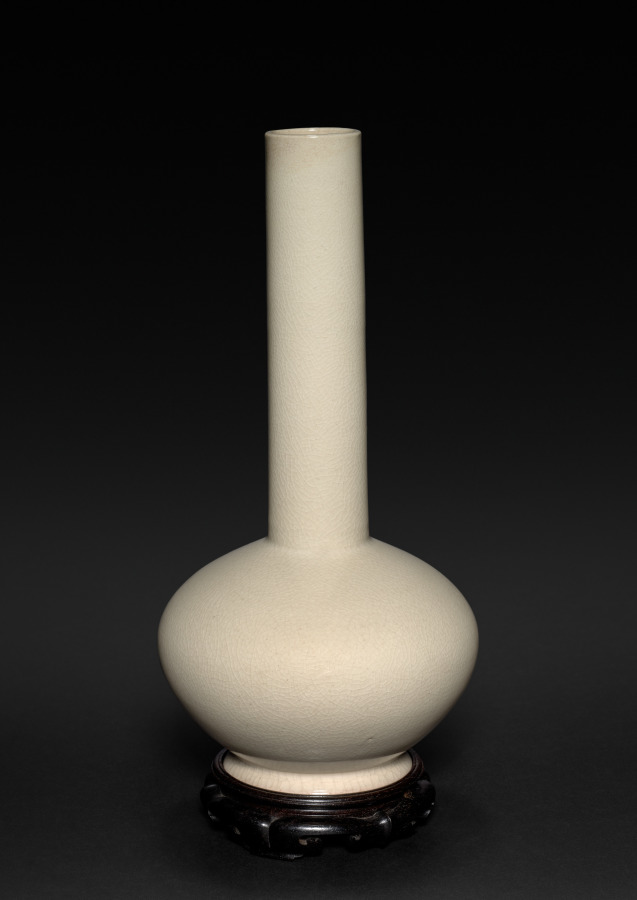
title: Long-Necked Vase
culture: Japan, Meiji period (1868–1912)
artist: Seifū Yohei III (Japanese, 1851–1914)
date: 1893–97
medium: Stoneware with crackled glaze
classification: Ceramic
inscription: 大日本清風造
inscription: 帝室技芸員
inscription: 清風盧人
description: The glazing of this long, narrow-necked and bulbous-based vase has a network of shallow cracks, created when the glaze fractured as it cooled from firing. It is called a cracked-ice pattern or glaze, since the effect resembles the surface of a frozen lake. The cracks here are of a consistently high density throughout the vessel. This pattern is observed also in the transparent glaze of some Kyoto ware, in some of Yohei III’s green glazes, and in some of his vessels emulating Chinese forms. The interior of the box lid has an attestation to its authenticity by Yohei IV, and the footring is inscribed Seifū of Great Japan (Dai Nihon Seifū) in iron black.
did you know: Seifū Yohei III apprenticed in the Seifū studio, married into the family, and later adopted the Seifū Yohei name, when he became head of the studio.